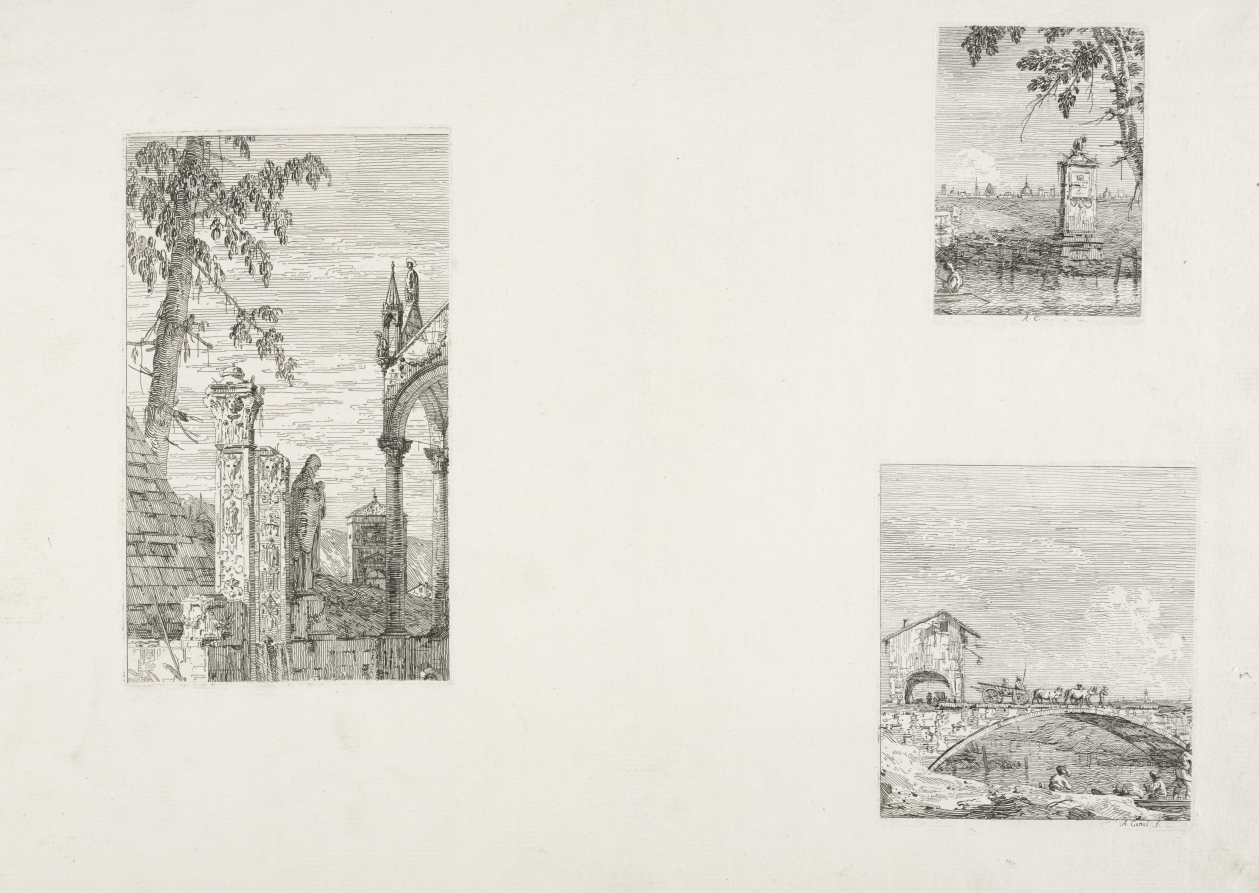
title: Views: The Little Monument under a Tree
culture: Italy, Venice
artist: Antonio Canaletto (Italian, 1697–1768)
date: 1735–1746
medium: etching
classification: Print